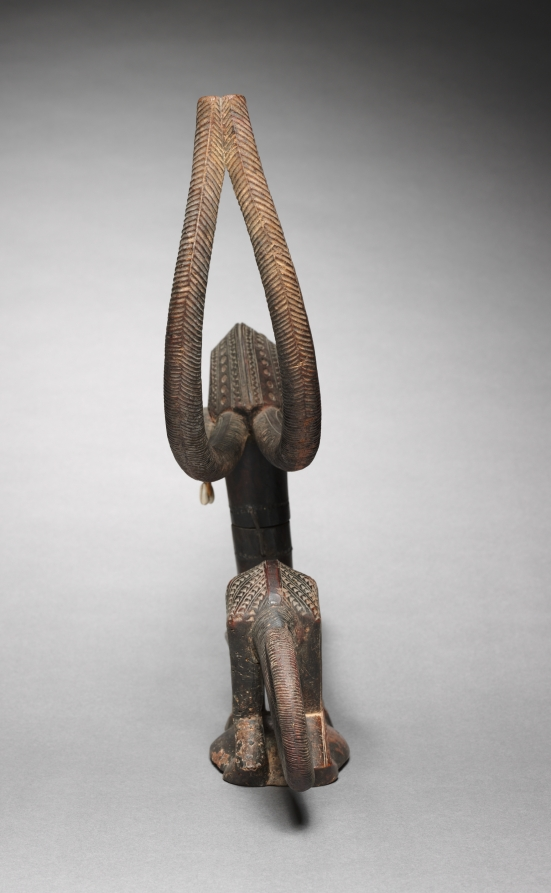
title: Headdress (chi wara)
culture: Africa, West Africa, Mali, Bamana-style blacksmith-carver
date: early to mid-1900s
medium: Wood, cowrie shells, glass beads, possibly aluminum, iron alloy, upholstery studs, and natural fibers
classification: Mask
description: Chi wara—a mythical “farming beast”—was said to teach farming to the Bamana people. Carved patterns cover this female chi wara’s body, highlighting its muscles and emphasizing that it is no earthly animal, but rather an agricultural spirit that combines human, antelope, and anteater elements. This example wears earrings and a nose ring of imported metals and beads. Its carver—a blacksmith—used a naturalistic style common south of the city of Bamako. Accompanied by women’s songs, male performers danced paired male-and-female chi wara headdresses affixed to basketry caps at agricultural competitions and weddings.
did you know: Chi wara headdresses look different depending on the region they were made in. The style of this example tells us it was likely made in the Djitoumou region of southern Mali.